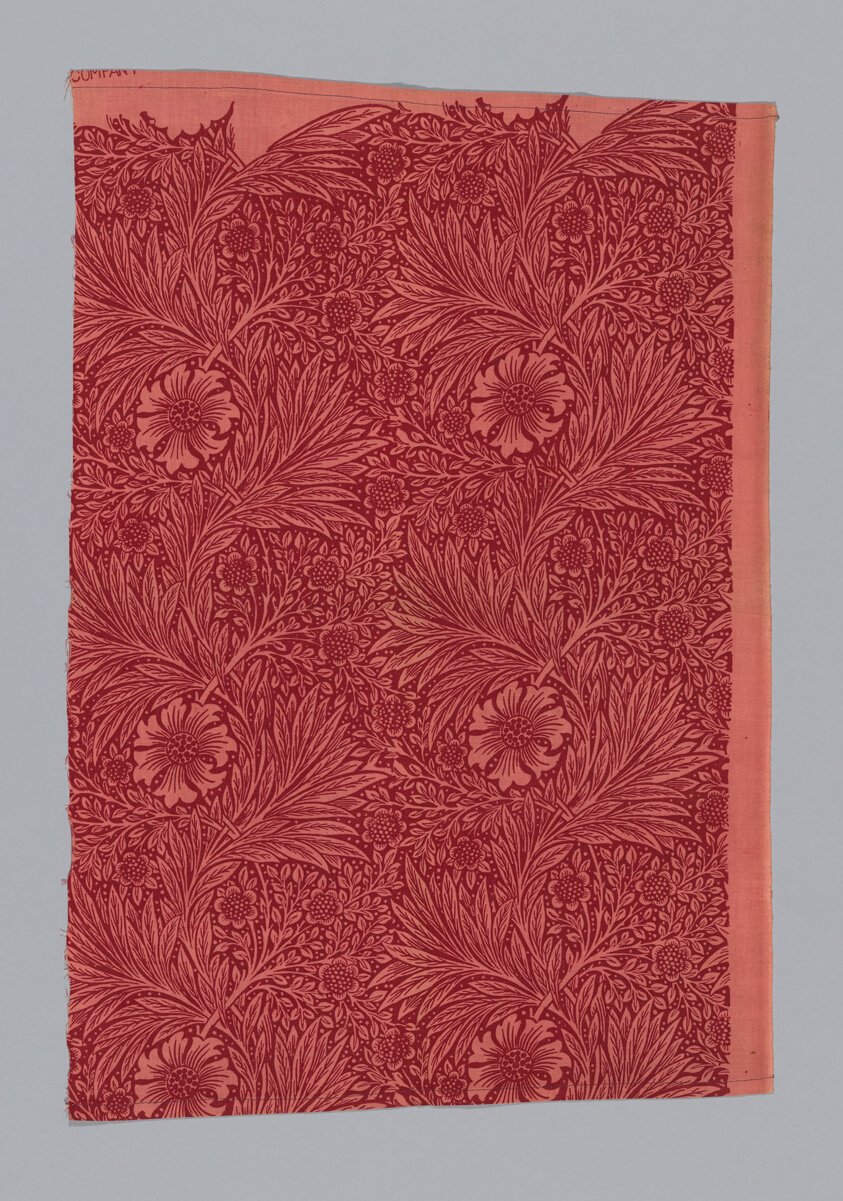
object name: Textile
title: Marigold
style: Arts and Crafts Movement, british, 19th century, 20th Century, British Arts and Crafts Movement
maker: Designed by William Morris (English, 1834–1896); Produced by Morris & Co., London (English, 1875–1940); Wardle & Co., Bridgnorth (English, 1875-1930)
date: Design 1875, made 1917–25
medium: Cotton, plain weave; block printed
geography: England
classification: textile; weaving - printed; printed textile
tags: flora, botanical, flowers